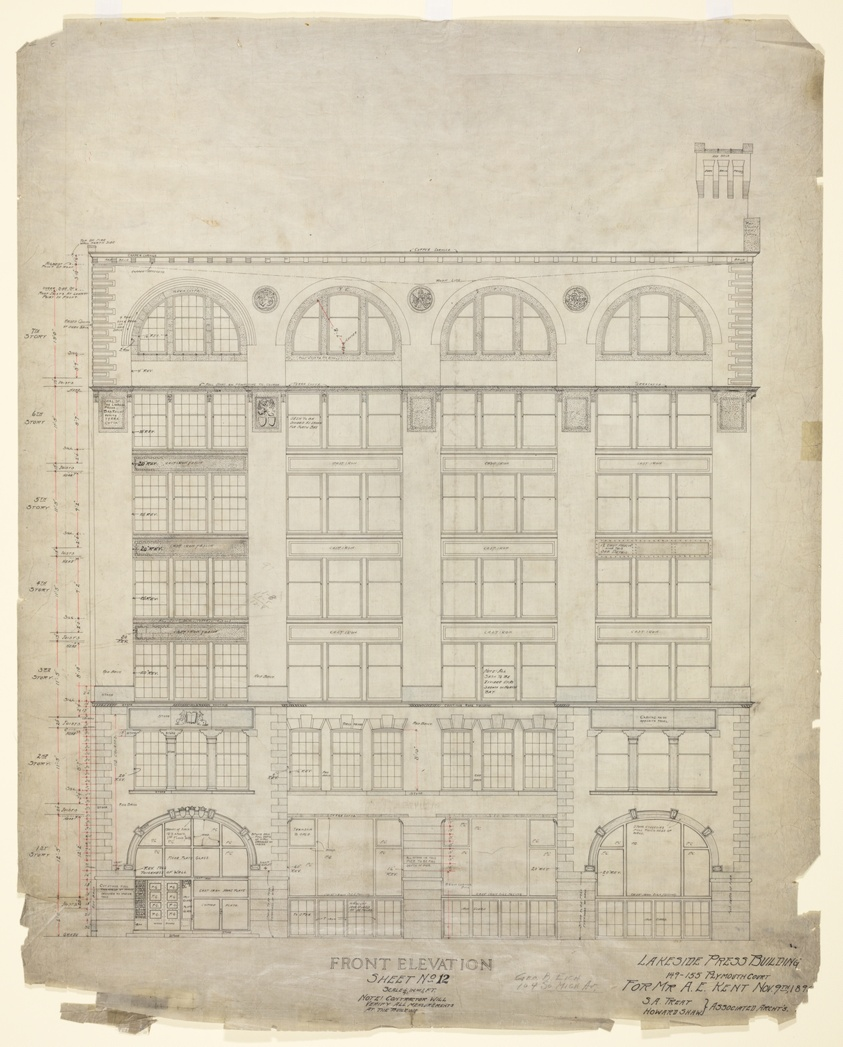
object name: Architectural Drawing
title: Lakeside Press Building, Chicago, Illinois, Front Elevation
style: 20th Century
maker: Treat & Shaw Associated Architects; American, 19th – 20th cent.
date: 11/9/1896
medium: Black and red ink on linen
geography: Chicago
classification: architectural drawing; architecture; elevation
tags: Chicago, drawing, architecture, elevation, lake michigan, buildings, illinois